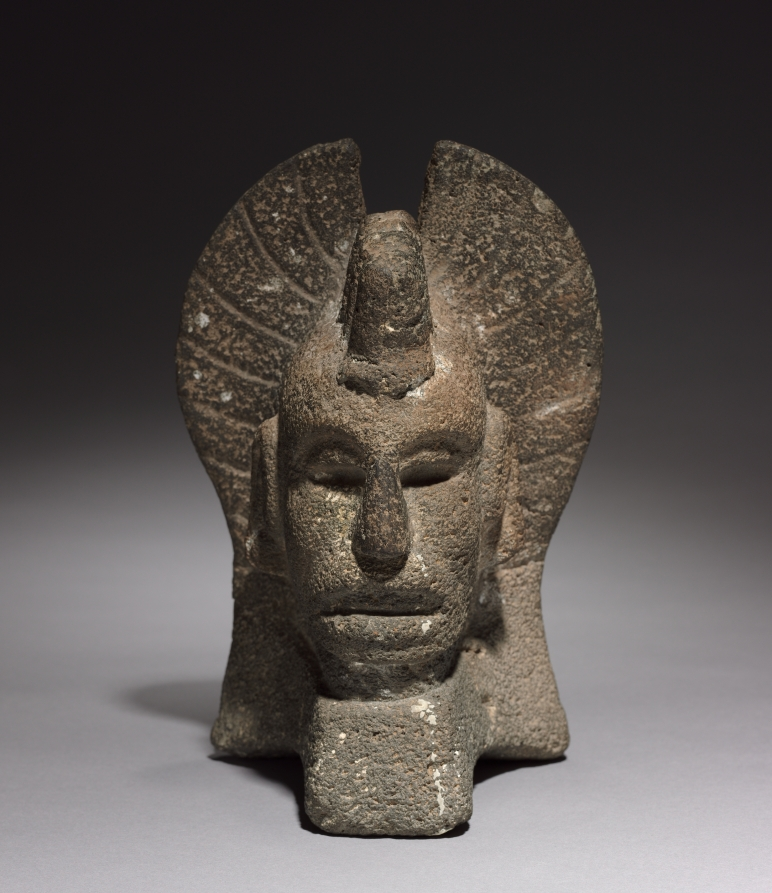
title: Head Palma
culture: Mexico, Veracruz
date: 600–1000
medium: gray volcanic stone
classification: Sculpture